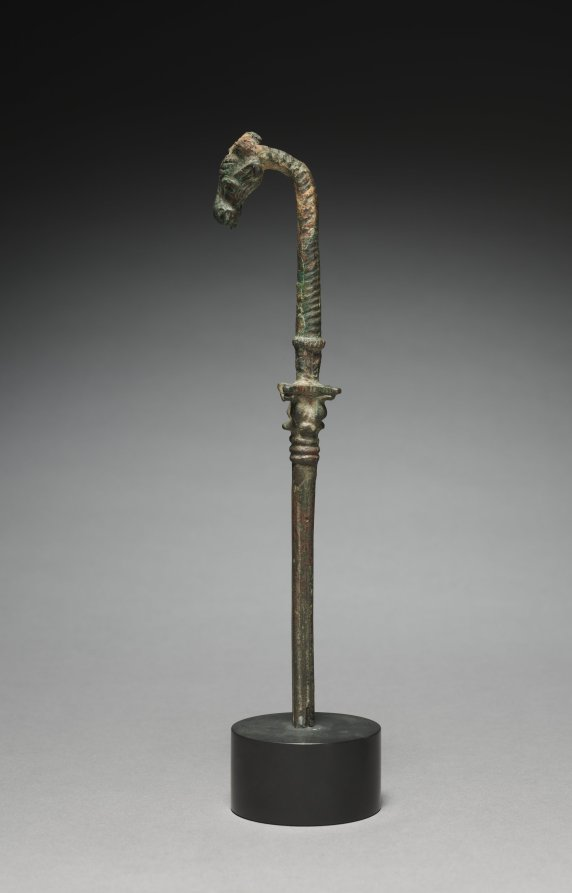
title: Votive Pin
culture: Iran, Luristan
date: early 1000s BCE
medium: bronze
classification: Metalwork